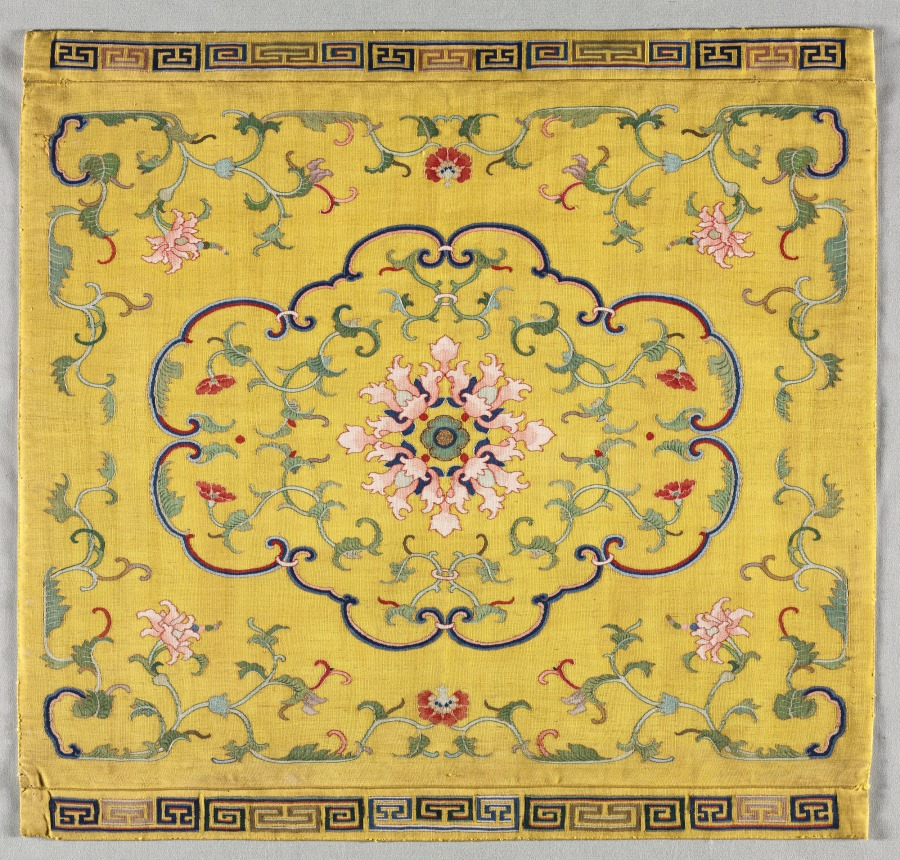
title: Cushion Cover (one of a set of four)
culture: China, Qing dynasty (1644-1911)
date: 1700s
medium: silk, metallic thread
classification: Textile